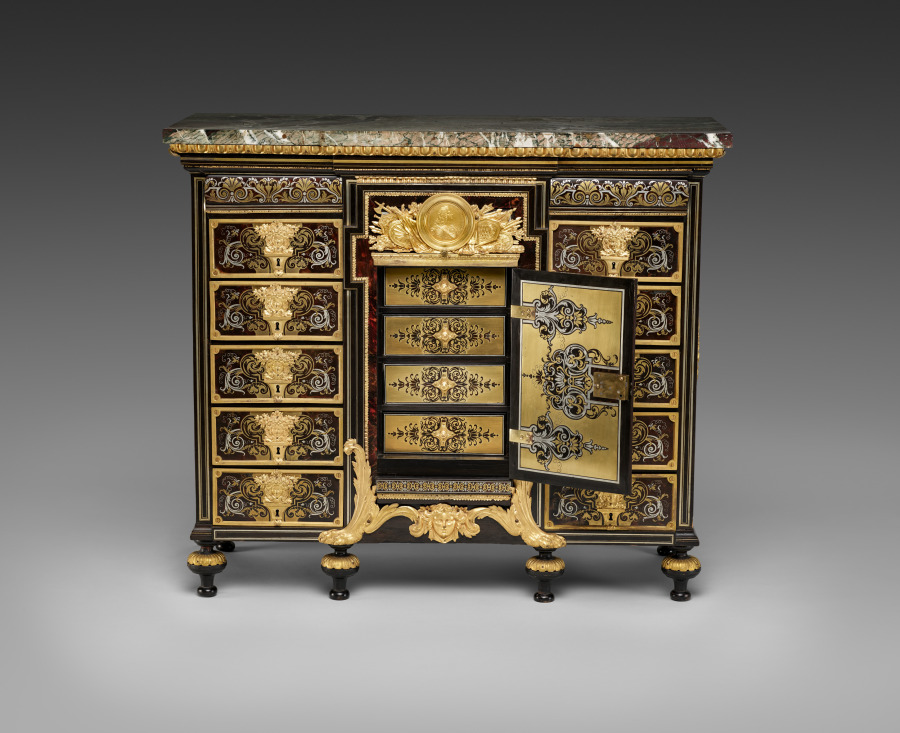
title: Cabinet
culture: France, late 17th Century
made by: André-Charles Boulle (French, 1642–1732)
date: c. 1690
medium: ebony, marquetry in metal and tortoise shell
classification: Furniture and woodwork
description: Appointed cabinetmaker to King Louis XIV in 1672, André-Charles Boulle became a master of furniture making in France during the late 1600s until his death in 1732. Known primarily for his use of marquetry, in which metal patterns are inlaid into tortoiseshell then applied within the veneered surface of the furniture, Boulle established a level of quality and craftsmanship few others could achieve. As a result, his work found favor at the royal court and among other aristocrats and diplomats eager to impress the king. The inclusion of a medallion depicting Louis XIV within the bronze decoration of this chest would have identified the owner with the royal court. Often exhibiting stout architectural proportions with elegant groups of inlaid motifs such as the parrot on the central panel of this chest, Boulle’s designs are an example of the intellectual fashion for contrasting ideas, materials, and motifs.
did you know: Originally designed to sit atop an elaborate tall stand, this chest was likely altered in the late 1700s to reduce its scale and height.